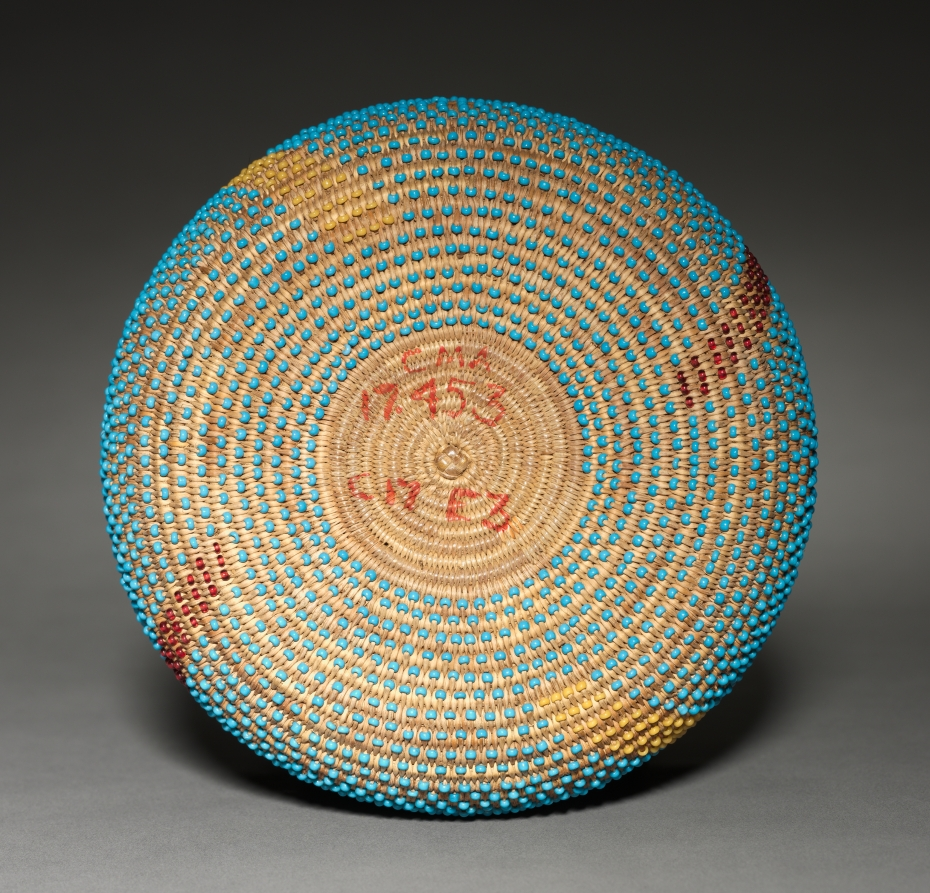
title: Gift Bowl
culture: California, Wappo, late 19th- early 20th century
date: c. 1890– 1905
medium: Sedge with beads; coiled ( 3 rods)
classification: Basketry